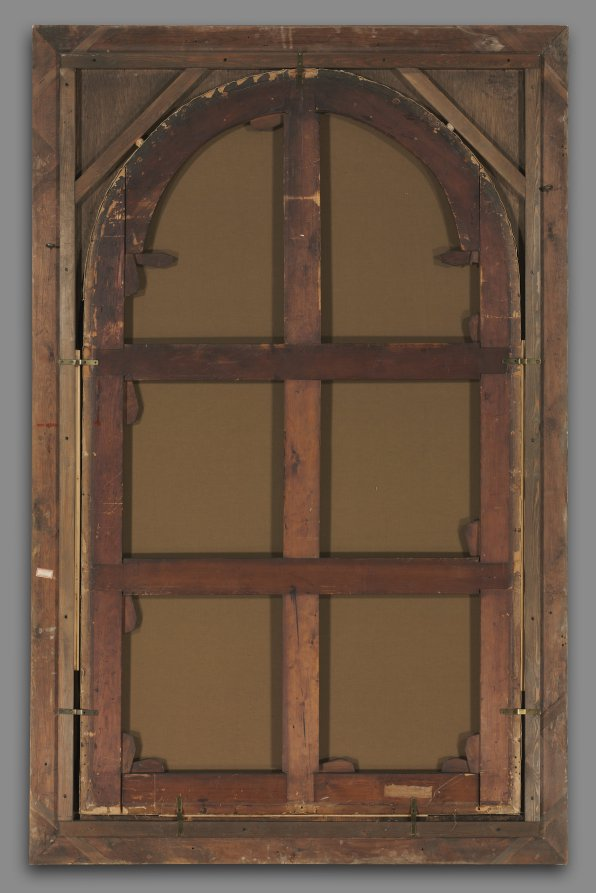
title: The Fall of Simon Magus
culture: Italy, 18th century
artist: studio of Pompeo Batoni (Italian, 1708–1787)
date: c. 1745–50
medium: oil on canvas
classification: Painting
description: Saints Peter and Paul came to Rome to win converts to Christianity soon after Christ’s death, while Simon Magus, claiming to be the son of God, attempted to prove his divinity by flying. Due to Saint Peter’s prayers, the demons supporting Simon abandoned him and he plummeted to his death. This work is probably a studio copy after a lost oil sketch for a huge altarpiece commissioned in 1746 for Saint Peter’s Basilica at the Vatican. Because of the humidity in Saint Peter’s, which quickly ruined paintings, the work was to have been translated into a massive mosaic. However, for reasons that remain unclear, Batoni’s mosaic was never created.